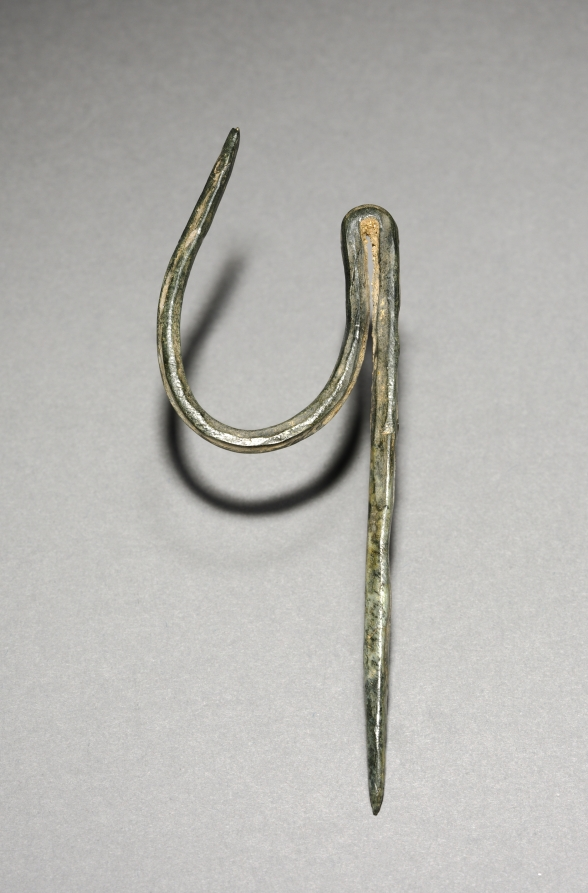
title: Topknot Pin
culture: Korea, Goryeo dynasty (918–1392)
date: 918–1392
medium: bronze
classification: Metalwork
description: Metallurgy advanced remarkably in the Goryeo period (918–1392), explaining why a large quantity of sophisticated metal artifacts were used not only as daily accessories but also as burial goods. Men put their hair in a knot at the top of their heads. To keep their long hair from falling, a bronze pin such as this one was used.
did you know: This bronze hairpin was for a man to fix his topknot.